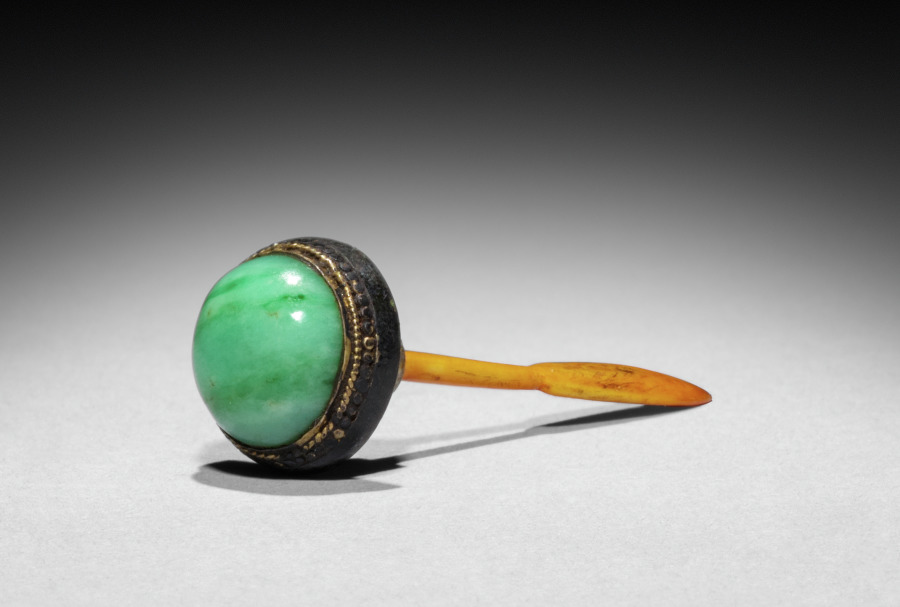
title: Flattened Ovoid Snuff Bottle with Stopper (stopper)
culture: China, Qing dynasty (1644-1911), Jiaqing reign (1796-1820)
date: 1796–1820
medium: porcelain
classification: Ceramic